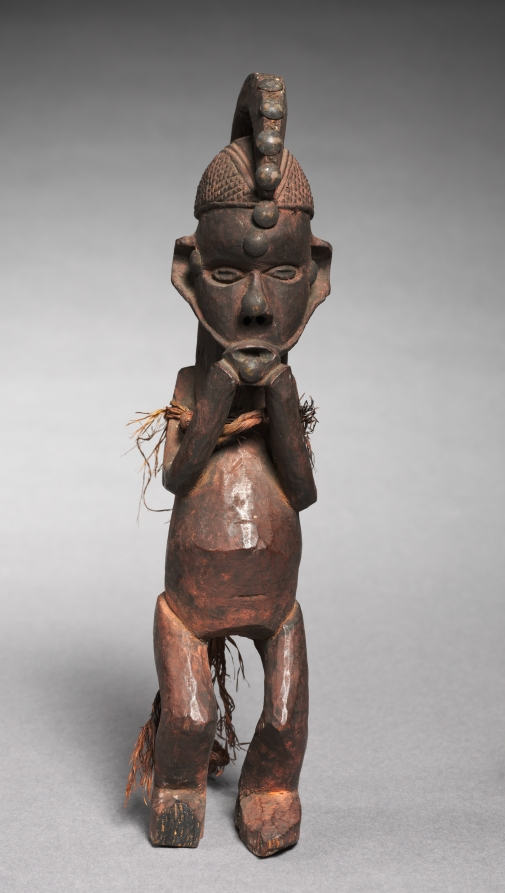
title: Male Figure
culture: Central Africa, Democratic Republic of the Congo, Suku, early 20th century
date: early 1900s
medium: Wood, upholstery studs, and plant fiber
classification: Sculpture